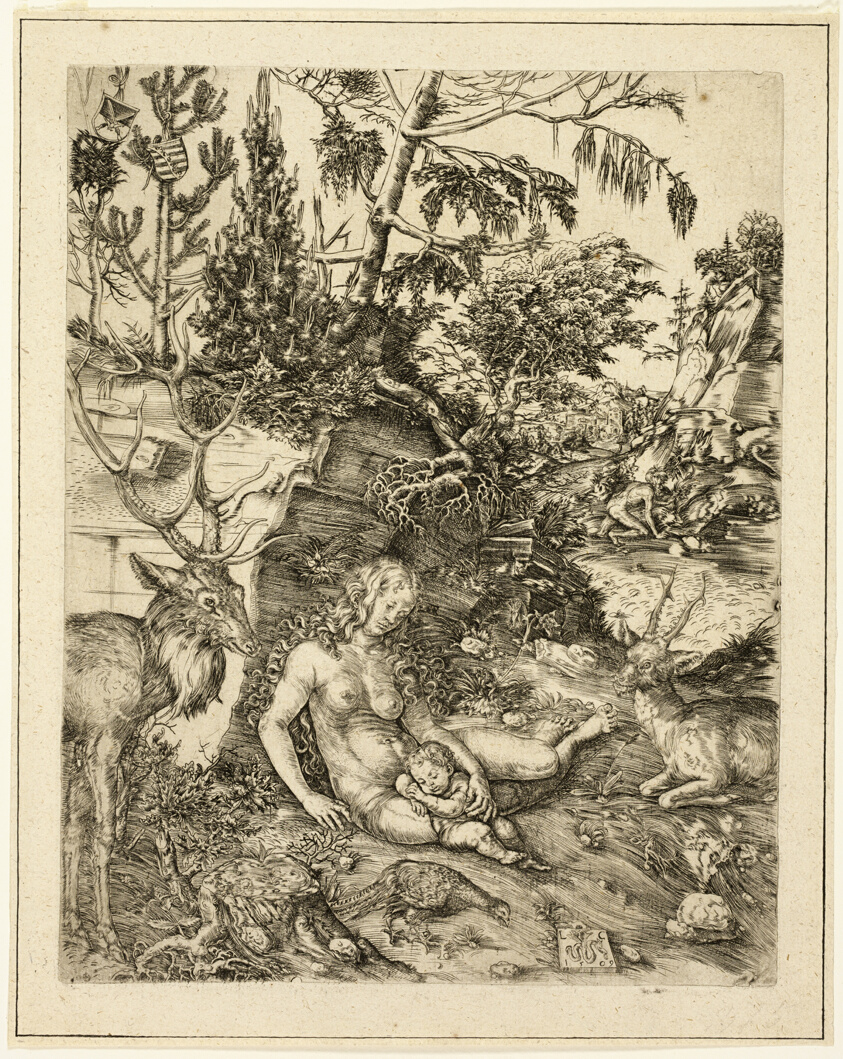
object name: Print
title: The Penitence of Saint John Chrysostom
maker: Lucas Cranach the Elder (German, 1472-1553)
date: 1509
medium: Engraving in black on cream laid paper, laid down on cream laid paper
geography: Germany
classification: engraving; print; prints and drawing